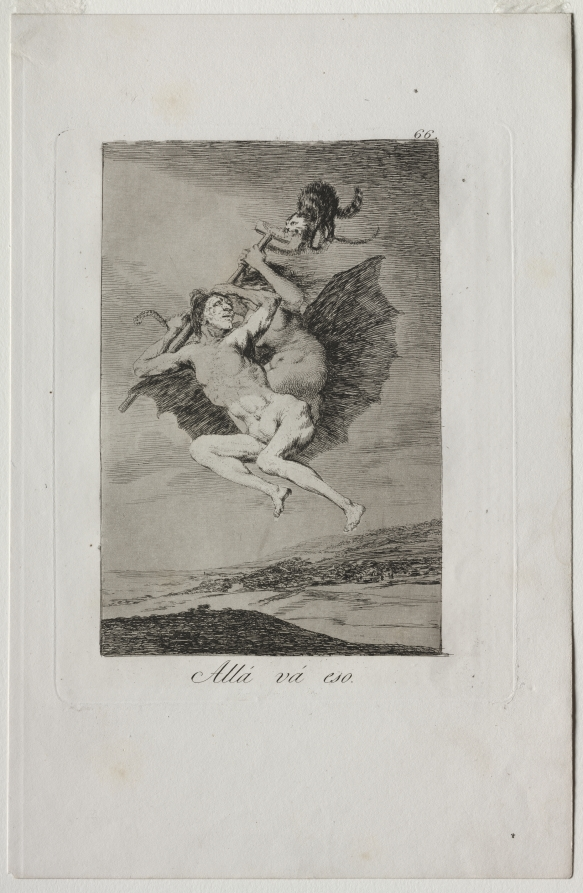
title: There It Goes, Plate 66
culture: Spain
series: Los Caprichos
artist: Francisco de Goya (Spanish, 1746–1828)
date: 1799 (printed c.1855)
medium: etching and aquatint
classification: Print